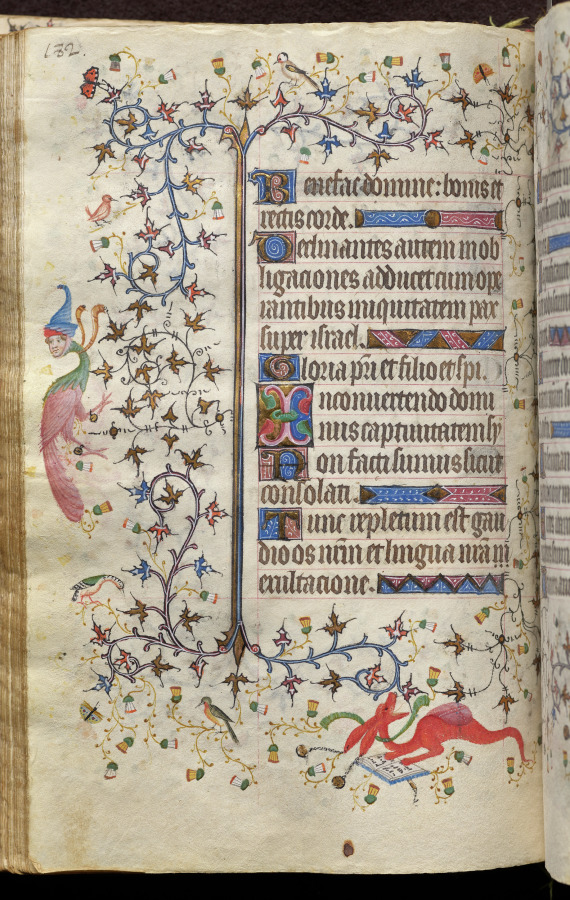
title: Hours of Charles the Noble, King of Navarre (1361-1425): fol. 91v, Text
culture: France, Paris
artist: Master of the Brussels Initials and Associates (French)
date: c. 1405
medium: ink, tempera, and gold on vellum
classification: Bound Volume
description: This precious volume was obviously highly prized by its owner, the French-born King of Navarre, who had his coat of arms painted on no less than twenty folios. Rather than directly commissioning this manuscript from a specific workshop, it seems that Charles the Noble acquired his book of hours -- perhaps ready-made for the luxury market -- while on a trip to Paris in 1404-05. A collaborative effort, six painting styles are evidenced within the pages of this codex, those of two Italians, two Frenchmen, and two Netherlanders. The painter who was responsible for the planning and decoration of the book, and who produced seventeen of the large miniatures, was a Bolognese artist known as the Master of the Brussels Initials. His principal assistant, responsible for most of the borders, was a Florentine who signed his name "Zecho" da Firenze on folio 208 verso.